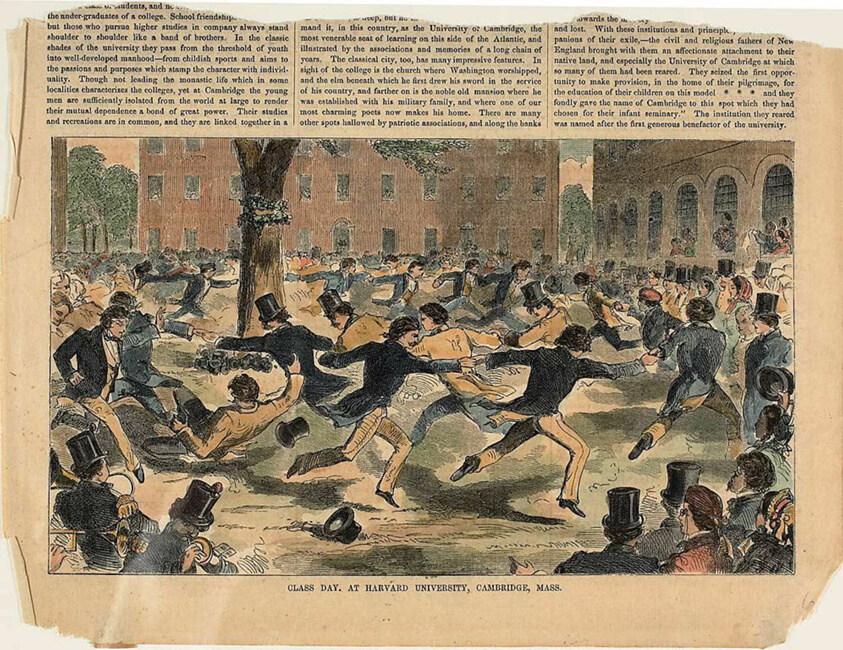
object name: Print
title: Class Day, at Harvard University, Cambridge, Massachusetts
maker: Winslow Homer (American, 1836-1910); published by Ballou's Pictorial Drawing Room Companion (American, 1851-1859)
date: published July 3, 1858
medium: Wood engraving on paper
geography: United States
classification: wood engraving; print; prints and drawing